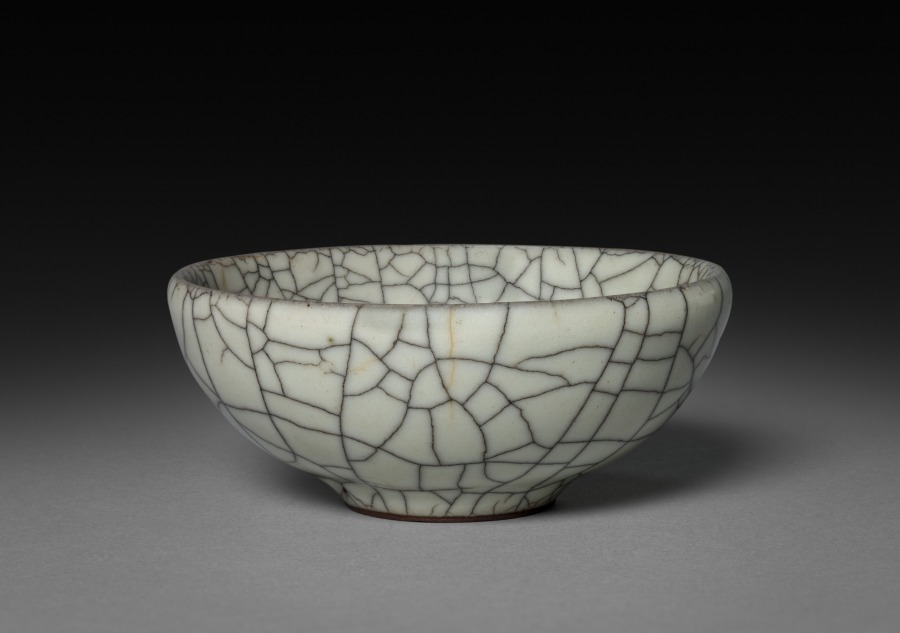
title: Wine Cup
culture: China, Song dynasty (960-1279)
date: 960–1279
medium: Glazed dark brown stoneware, Guan ware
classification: Ceramic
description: Wine was often served hot in porcelain cups that could also be used in popular drinking games.